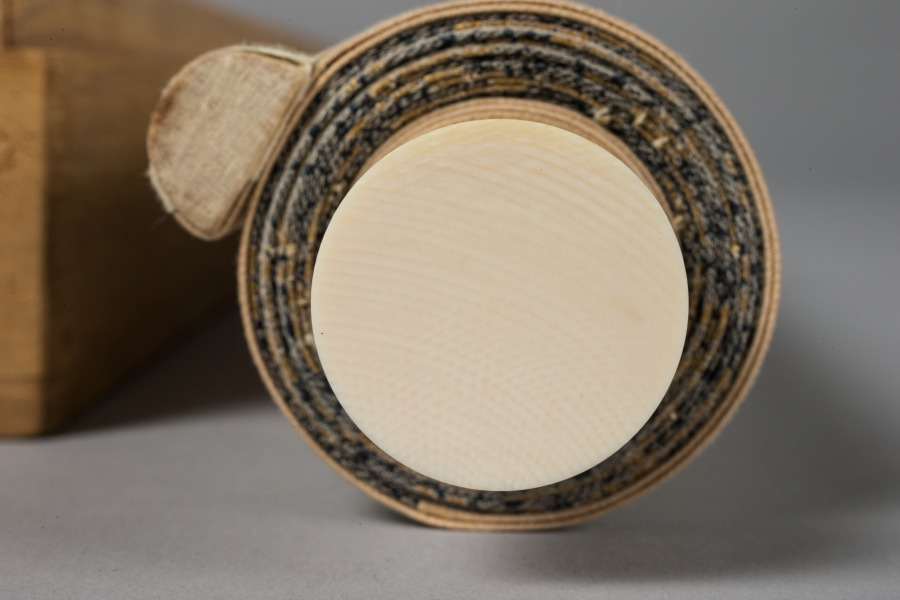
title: Stand-in Fugen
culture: Japan, Edo period (1615–1868)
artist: Kitao Masayoshi (Japanese, 1761–1824)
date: late 1700s–early 1800s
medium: hanging scroll; ink and color on silk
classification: Painting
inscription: artist's signature and two seals, lower right.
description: Here, a woman dressed as a man replaces Fugen, a bodhisattva—a being among those considered enlightened in Buddhism—who symbolizes learning as a path to awakening and typically rides an elephant. The painting teaches the lesson of impermanence through the petals falling from the lotus flower the woman holds. It also alludes to the legend of Eguchi, a 12th-century courtesan who, following an encounter with a Buddhist monk-poet called Saigyō, revealed herself to be a manifestation of Fugen.